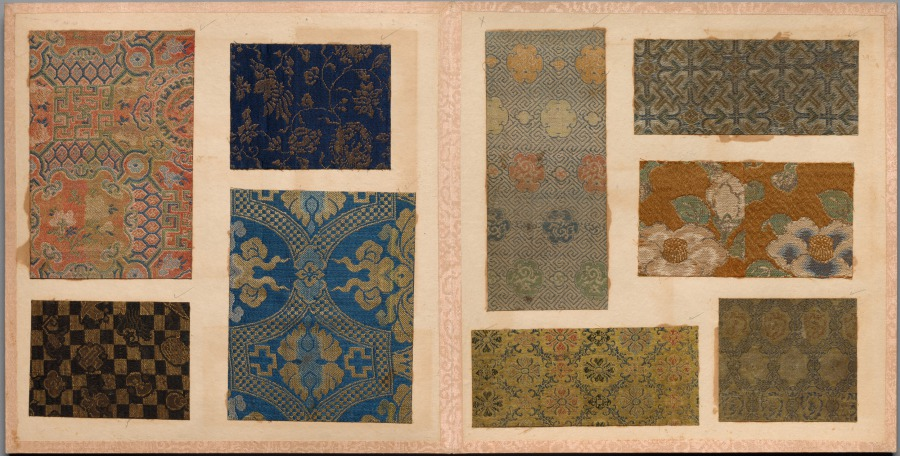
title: Album of Textile Samples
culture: Japan and China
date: 1700s–1800s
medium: silk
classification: Textile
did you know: This album has 26 pages containing 128 mounted Chinese or Japanese textile samples.